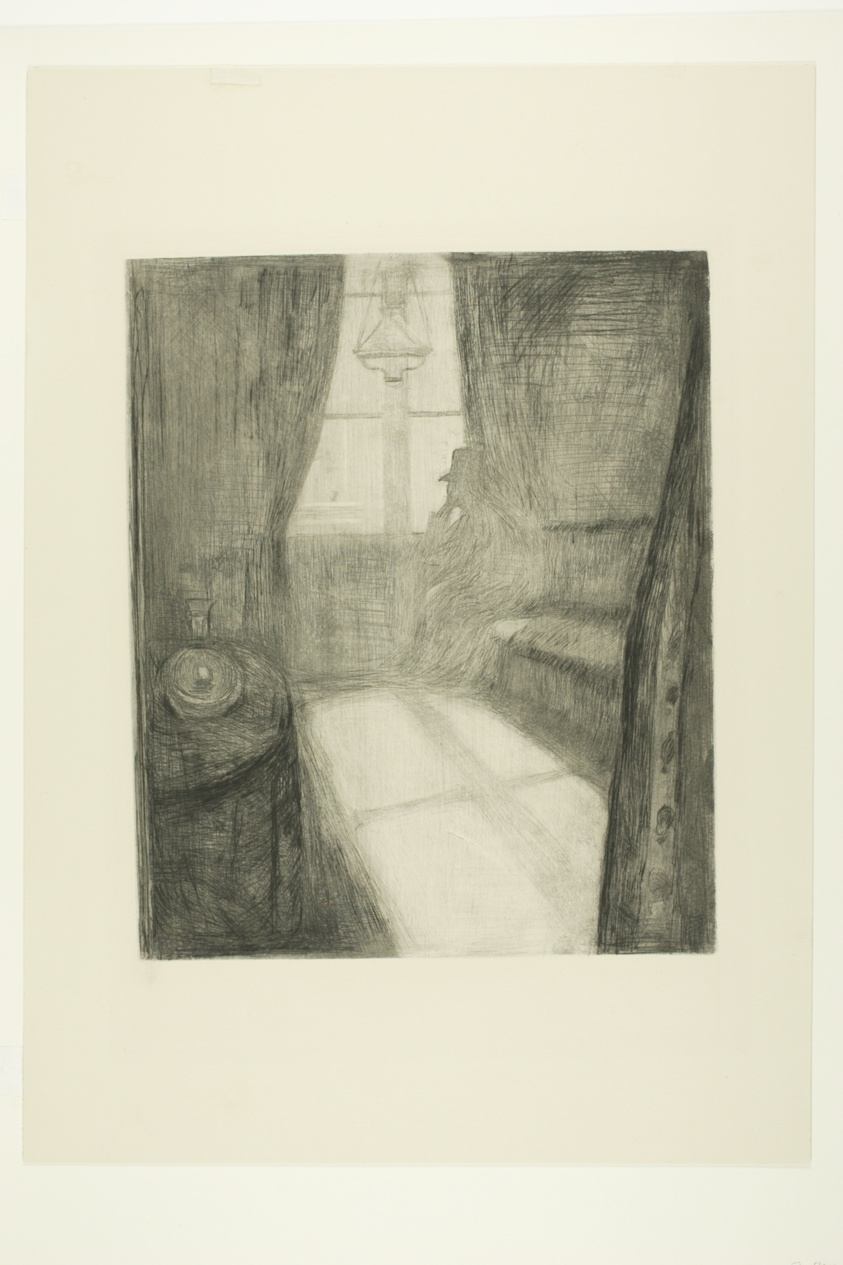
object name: Print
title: Moonlight. Night in St Cloud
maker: Edvard Munch (Norwegian, 1863-1944)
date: 1895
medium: Drypoint, with open bite and burnishing, on cream wove paper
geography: Norway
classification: etching; print; prints and drawing